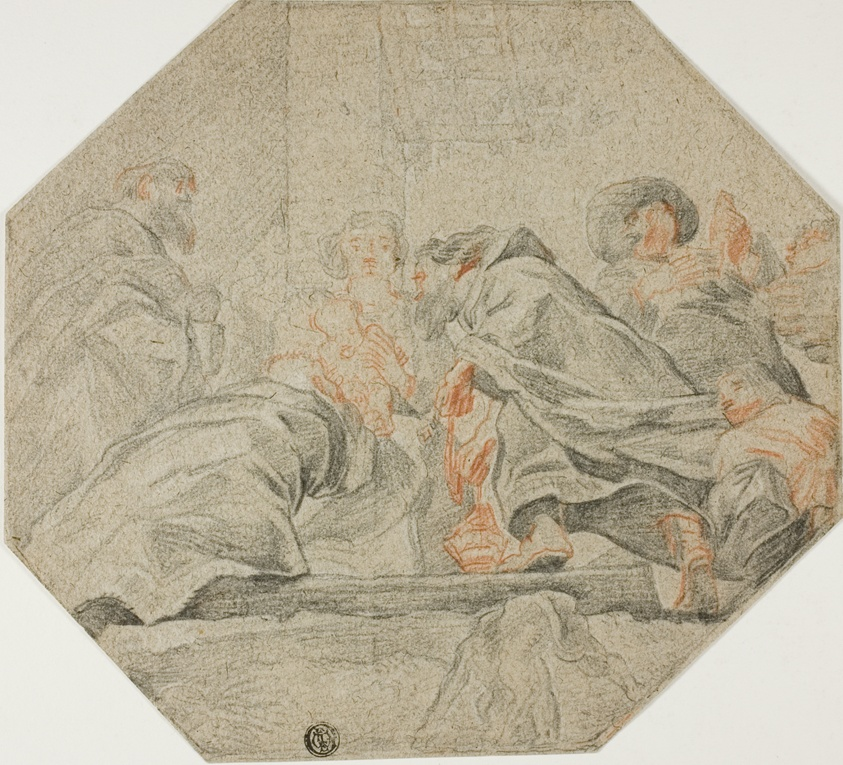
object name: Drawing and Watercolor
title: Adoration of the Magi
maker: Possibly after Peter Paul Rubens; Flemish, 1577-1640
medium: Black and red chalk, heightened with touches of white chalk, on tan laid paper (octagon)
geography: Flanders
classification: chalk; drawings (visual works); prints and drawing